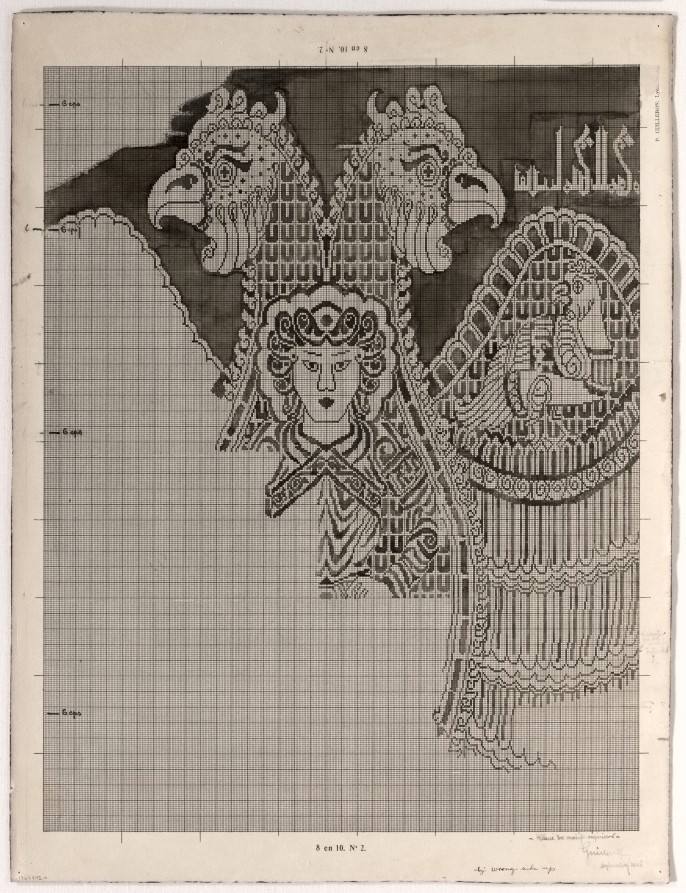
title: Schematic Drawing of Buyid Silk (1962.264)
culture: France, 20th century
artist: Félix Guichert (French)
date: 1900s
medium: ink on paper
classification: Drawing